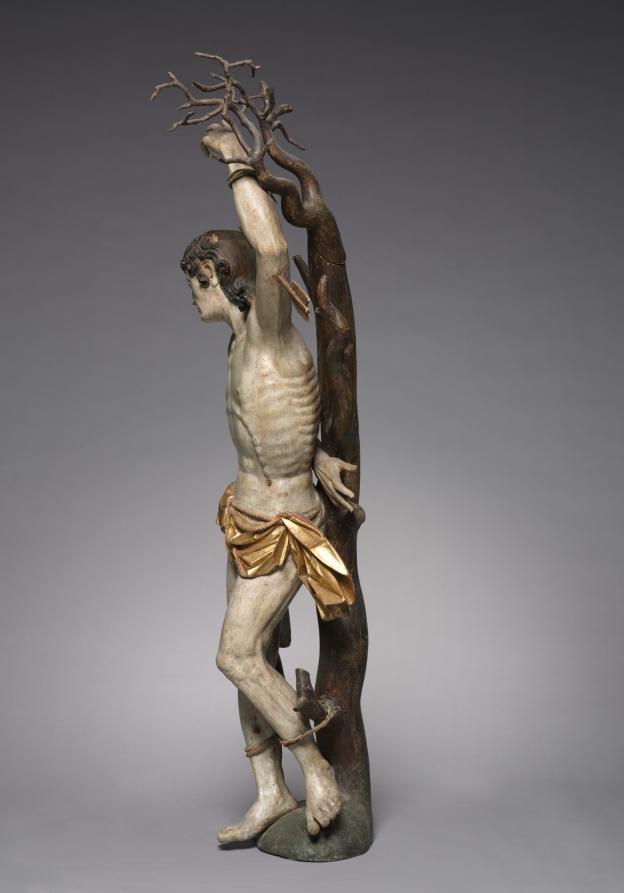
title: Saint Sebastian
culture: Germany, early 17th century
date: c. 1600–1620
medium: painted and gilded wood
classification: Sculpture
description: An early Christian saint and martyr, Sebastian was condemned to death by the Roman emperor Diocletian. Bound to a tree and shot with arrows, he survived—only later to be martyred by beating. This figure embodies the blend of stylistic influences that characterized German sculpture in the early 1600s. The graceful pose and anatomical naturalism of the legs indicate the influence of Italian Mannerism, while the crisp, stylized patterns of Sebastian’s hair and loincloth recall German Gothic works from the 1400s. The tree to which Sebastian is bound is an actual branch, shaped and refined to its present appearance.